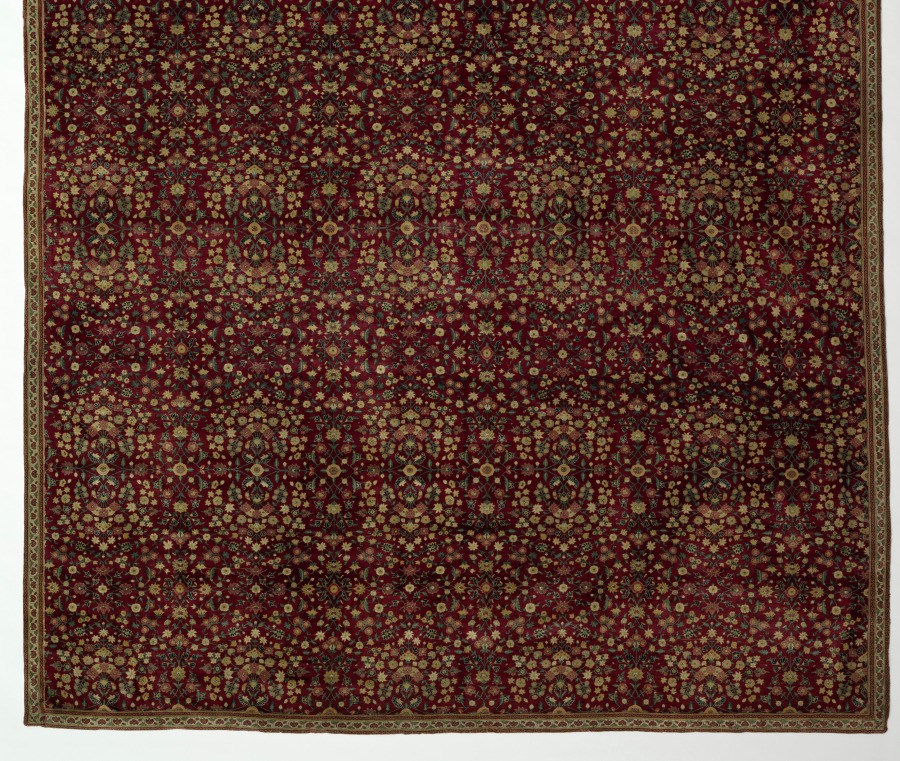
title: Woolen carpet with millefleurs decoration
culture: India, Kashmir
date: early 1600s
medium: Pashmina (wool): asymmetrical knot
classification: Carpet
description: Pashmina, a very fine fiber made from the fleece of Himalayan goats, was a material highly valued at the Mughal courts. Luxury rugs functioned in several ways, including as insulators for palatial and ceremonial spaces and as framing devices for important figures. In a biography of the Mughal emperor Akbar (reigned 1556–1605), called the Ain-i-Akbari, the court historian Abu’l Fazl (1551–1602) poetically wrote that such textiles created “a beautiful flowerbed.” The description is apt, as this carpet features an impressively symmetrical floral design known as millefleurs, or “thousand flowers” in French. Viewing several of these carpets and other hangings at once would have been visually impressive for court attendees.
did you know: The border contrasts with the central design, putting red flowers against a white background.